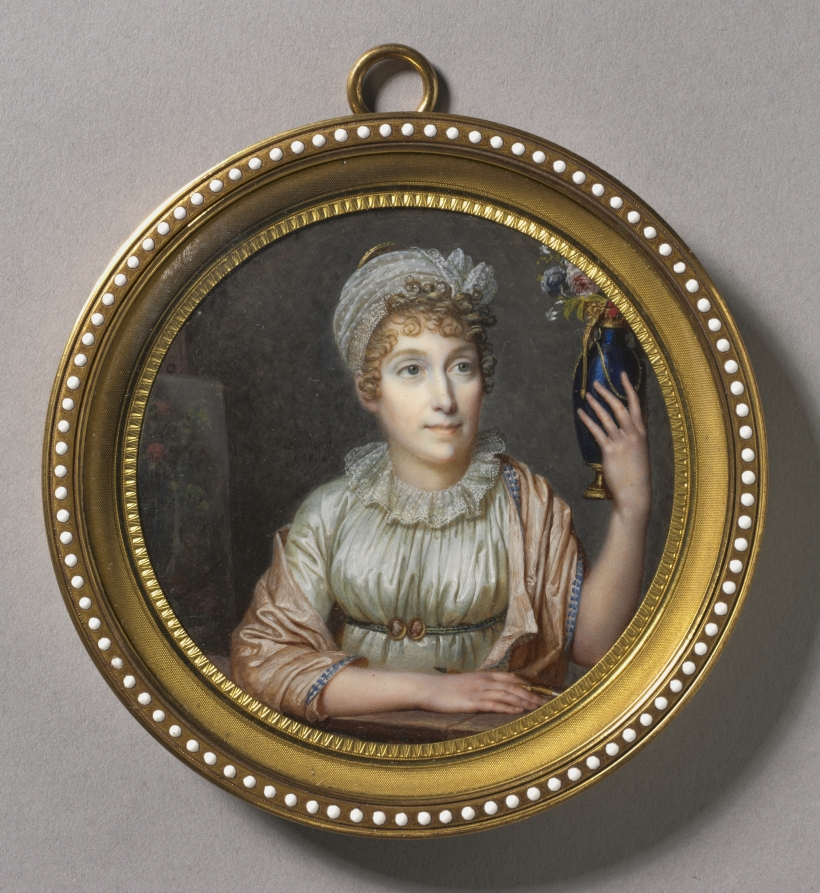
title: Portrait of Anne Vallayer-Coster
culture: France, 19th century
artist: François Dumont (French, 1751–1831)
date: 1804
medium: watercolor on ivory in a gilt metal and enamel frame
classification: Portrait Miniature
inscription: signed left: Dumont / f. 1804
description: Born in 1744, Anne Vallayer-Coster was a prominent still-life painter in France during the 1770s and 1780s. The daughter of a goldsmith, she grew up observing the intricacies of metalwork, acquiring an attention to detail apparent in her paintings. She was apprenticed to the seascape painter Joseph Vernet who encouraged her to pursue painting as a profession. In 1770 Vallayer-Coster sought membership in the exclusive French Académie Royale de Peinture et de Sculpture with the submission of two still-life paintings, "The Attributes of Painting, Sculpture, and Architecture" and "The Attributes of Music." She was accepted with full rights and privileges to the overwhelmingly male academy-the only woman to be granted membership during this period independent of royal support or ties to a male academician. Denis Diderot, a French art critic and philosopher, responded to her submissions: "It is certain that if all new members made a showing like Mademoiselle Vallayer's, and sustained the same high level of quality there, the Salon would look very different!" Since women were officially barred during the 18th century from studying the male nude from life, still-life painting was among the few genres open to female painters. Garnering a reputation as a beautiful socialite who possessed the painting skills usually ascribed to male history painters, she was the only woman to enjoy the honor of lodging in the Louvre under the invitation of Marie Antoinette, who greatly admired her work. Marie Antoinette herself was present at the artist's 1781 marriage to Jean-Pierre-Silvestre Coster in the halls of Versailles. Despite the close associations with Antoinette and her administration, Vallayer-Coster survived the French Revolution of 1789 and the Reign of Terror in 1793. Many of her patrons were not so fortunate, and the artist's production virtually stopped until 1804, when François Dumont painted this miniature. During this period, Vallayer-Coster struggled to reestablish herself among the elite of Paris. Over the course of 1804, she exhibited two works at the Salon and had two works commissioned by Empress Josephine de Beauharnais. Dumont's miniature depicts Vallayer-Coster holding a paintbrush in her right hand and a vase with flowers in her left, clearly an allusion to her skill as a still-life painter. Perhaps Vallayer-Coster requested that Dumont portray her as an artist in order to reassert her status as an important still-life painter. She may have intended to give the miniature to the empress in gratitude for her commissions and in the hope that there would be more to come. Her last major work, "Still Life with Lobster", was given to Louis XVIII and displayed at the Salon in 1817. Vallayer-Coster died in 1818 at the age of 74. Dumont worked closely with Marie Antoinette and, like Vallayer-Coster, grappled with diminished patronage after the queen's death and years of revolution. He attempted to reestablish his practice during the reigns of the Bourbon kings Louis XVIII and Charles X, but the competition provided by miniaturists like Jean-Baptiste Isabey (1767-1855) proved too strong. Dumont's exquisite portrait of Vallayer-Coster was produced during a time when both artist and sitter had fallen from the limelight and were struggling to prove their enduring relevance in the new regime. Ashley Bartman (May 2014)